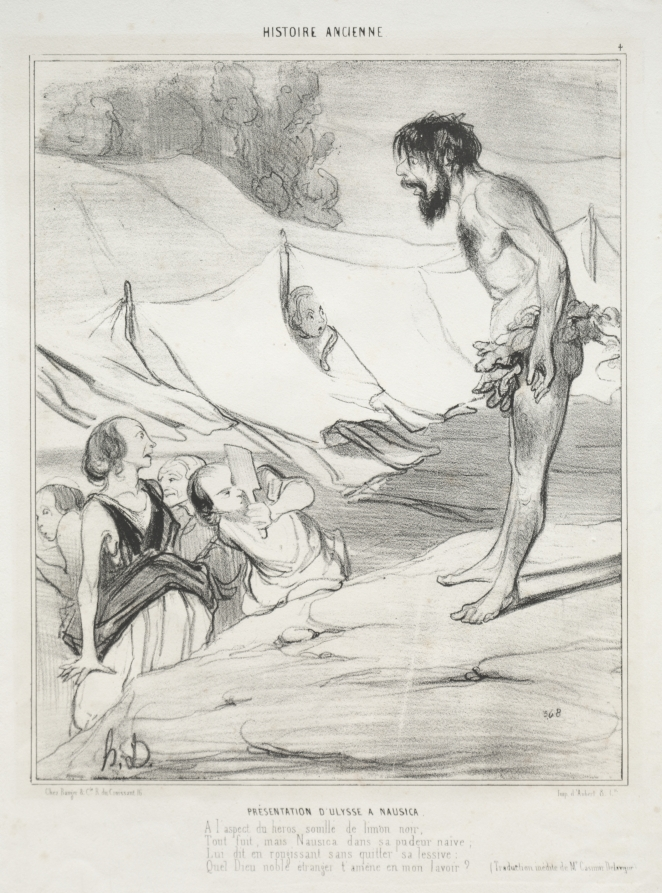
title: Introduction of Ulysses to Nausica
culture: France, 19th century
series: Ancient History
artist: Honoré Daumier (French, 1808–1879)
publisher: Aubert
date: 1842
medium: lithograph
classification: Print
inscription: Lower margin, printed: Chez Bauger & Cie. R. du Croissant 16 / Imp. d'Aubert & Cie. ; verso, collectors mark: ZB?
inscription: Above image, printed: HISTOIRE ANCIENNE / 4 ; below image, printed: PRÉSENTATION D'ULYSSE A NAUSICAA / A l'aspect du héros souillé de limon noir, / Tout fuit, mais Nausica dans sa pudeur naïve; / Lui dit en rougissant sans quitter sa lessive: / Quel Dieu noble étranger t'amène en mon lavoir? / (Traduction inédite de Mr. casimir Delavigne).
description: This print was published in Le Charivari (March 30, 1842) as plate 4 from the series Ancient History.